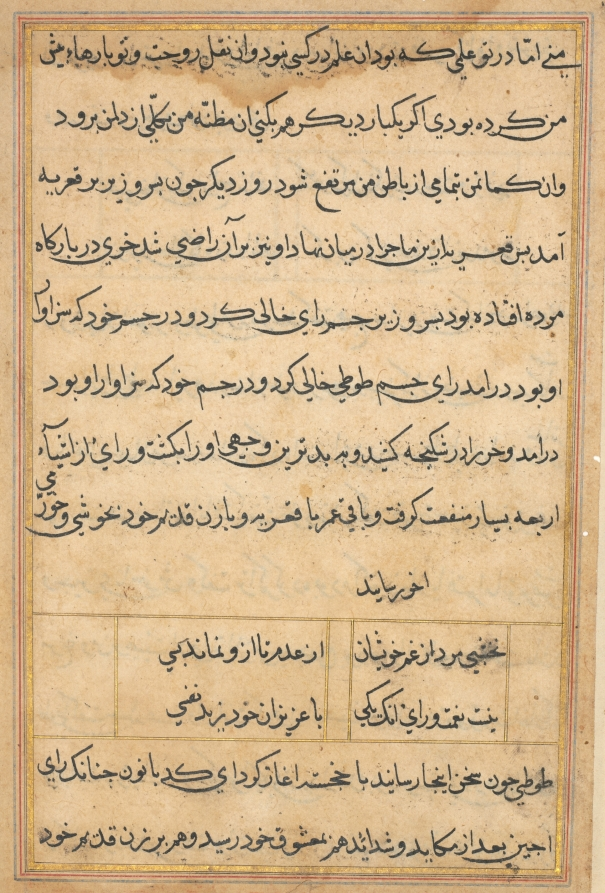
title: Page from Tales of a Parrot (Tuti-nama): text page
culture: Mughal India, court of Akbar (reigned 1556–1605)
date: c. 1560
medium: gum tempera, ink, and gold on paper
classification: Painting